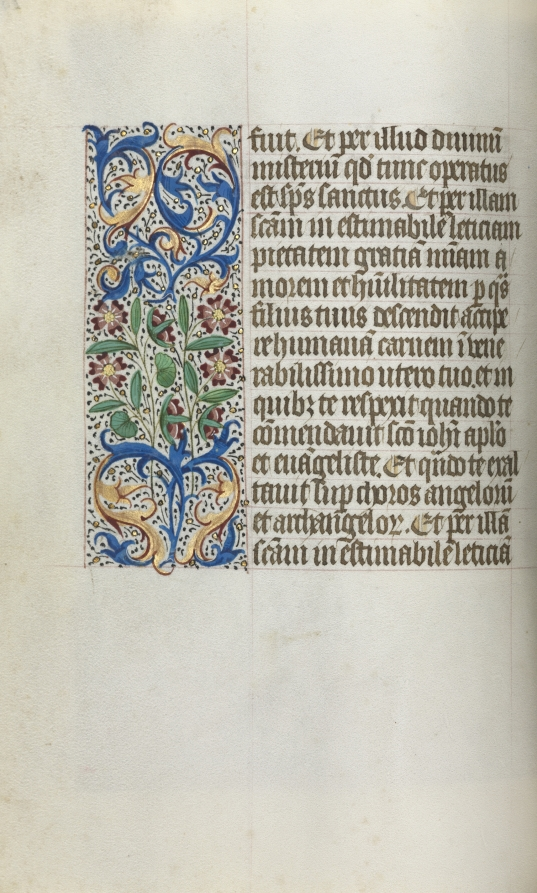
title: Book of Hours (Use of Rouen): fol. 19v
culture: France, Rouen, 15th century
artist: Master of the Geneva Latini (French, active Rouen, 1460–80)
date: c. 1470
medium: ink, tempera, and gold on vellum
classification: Bound Volume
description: In the late 1400s and early 1500s Rouen was an established and important center of book production. The city’s cathedral had a wealthy chapter that spent large sums of money to commission books and to maintain its extensive library. The stationers and booksellers would have likely been concentrated in or near the cathedral precinct. This artist, named after a manuscript now in Geneva, was Rouen’s principal illuminator during the second half of the 1400s.